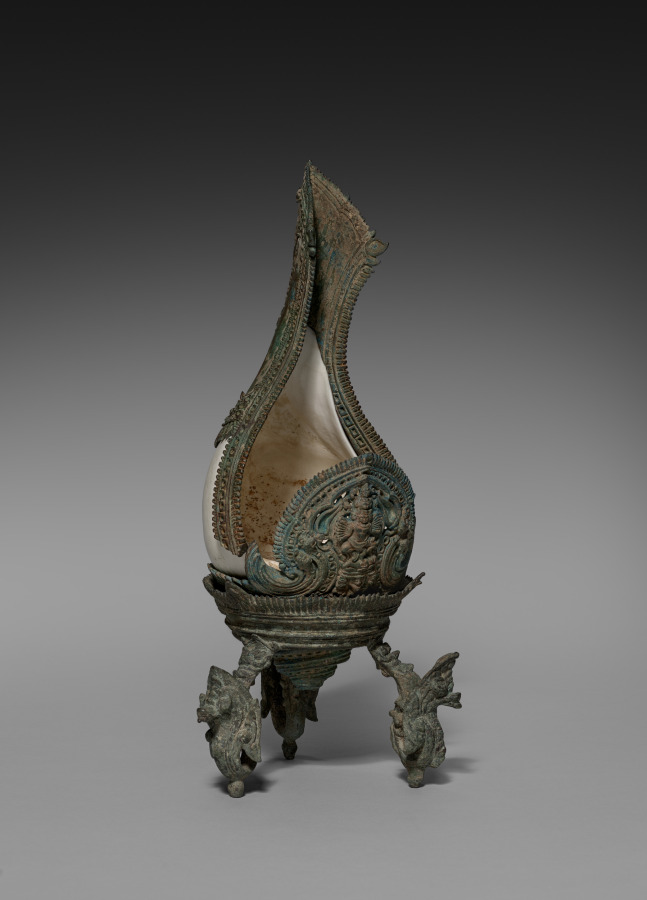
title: Conch Shell with a Figure of Hevajra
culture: Cambodia, Khmer, Angkor Period, 12th-13th Century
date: 1100s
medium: shell and bronze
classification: Sculpture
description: A royal temple like Banteay Chhmar was built for performing rituals and to honor images of gods, Buddhas, and other sacred or enlightened beings for the sake of the kingdom’s protection and ongoing prosperity. Conch shells were blown at the start of rituals to make the sound corresponding to the syllable om. The dancing figure of Hevajra, a Buddhist being of enlightenment with eight heads, sixteen arms, and four legs, has been worked into the bronze embellishment of the shell. Hevajra was elevated to a prominent position in Khmer Buddhism of the Angkorian period as the standard figure denoting the practice of rituals prescribed in a text called the Hevajra-tantra. The tripod stand with three serpents is probably not original to the shell.